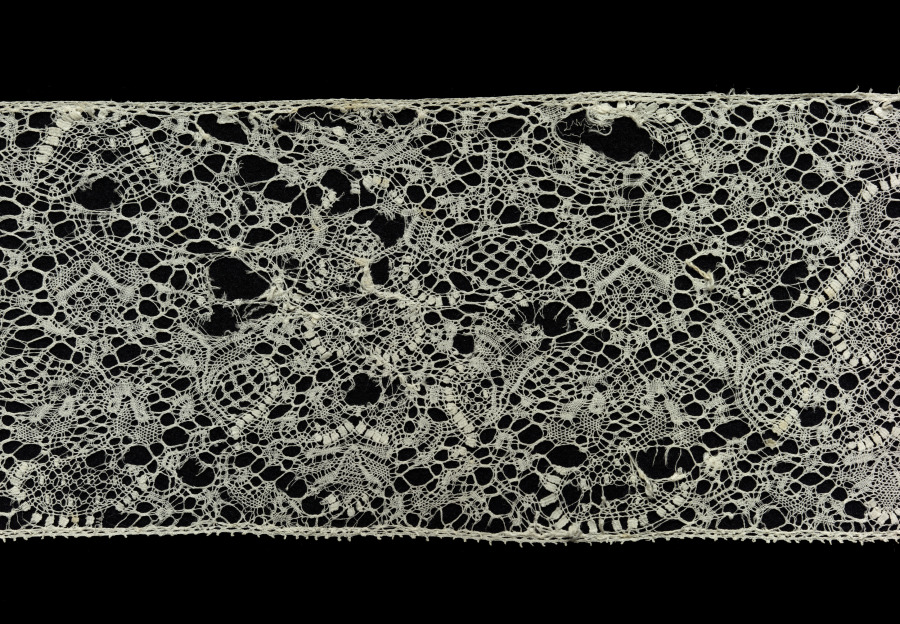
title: Lace Edging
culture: Belgium, Binche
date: 1700s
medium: Linen: bobbin lace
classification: Lace